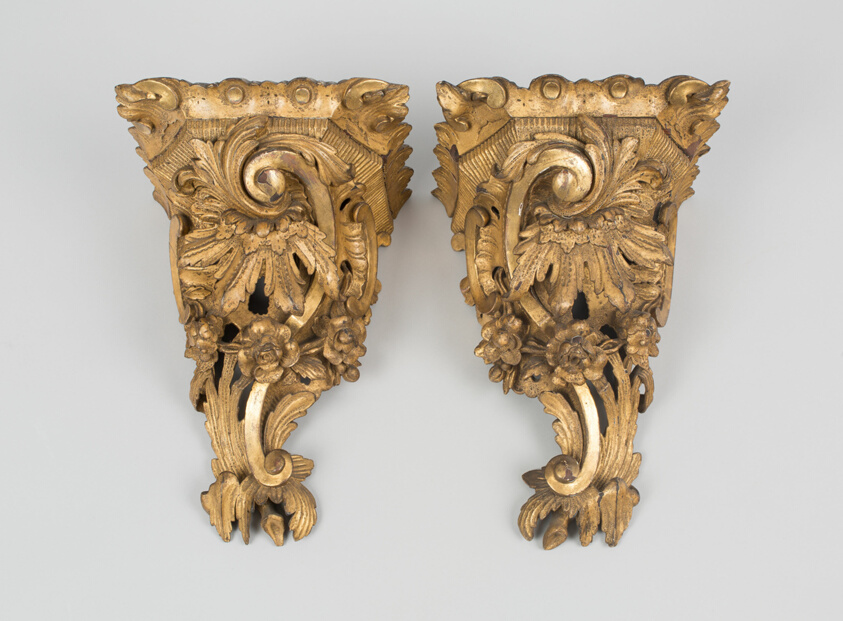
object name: Furniture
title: Pair of Brackets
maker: England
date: 1740/50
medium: Pine, carved and gilded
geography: England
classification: rack; furniture; european decorative arts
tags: furniture